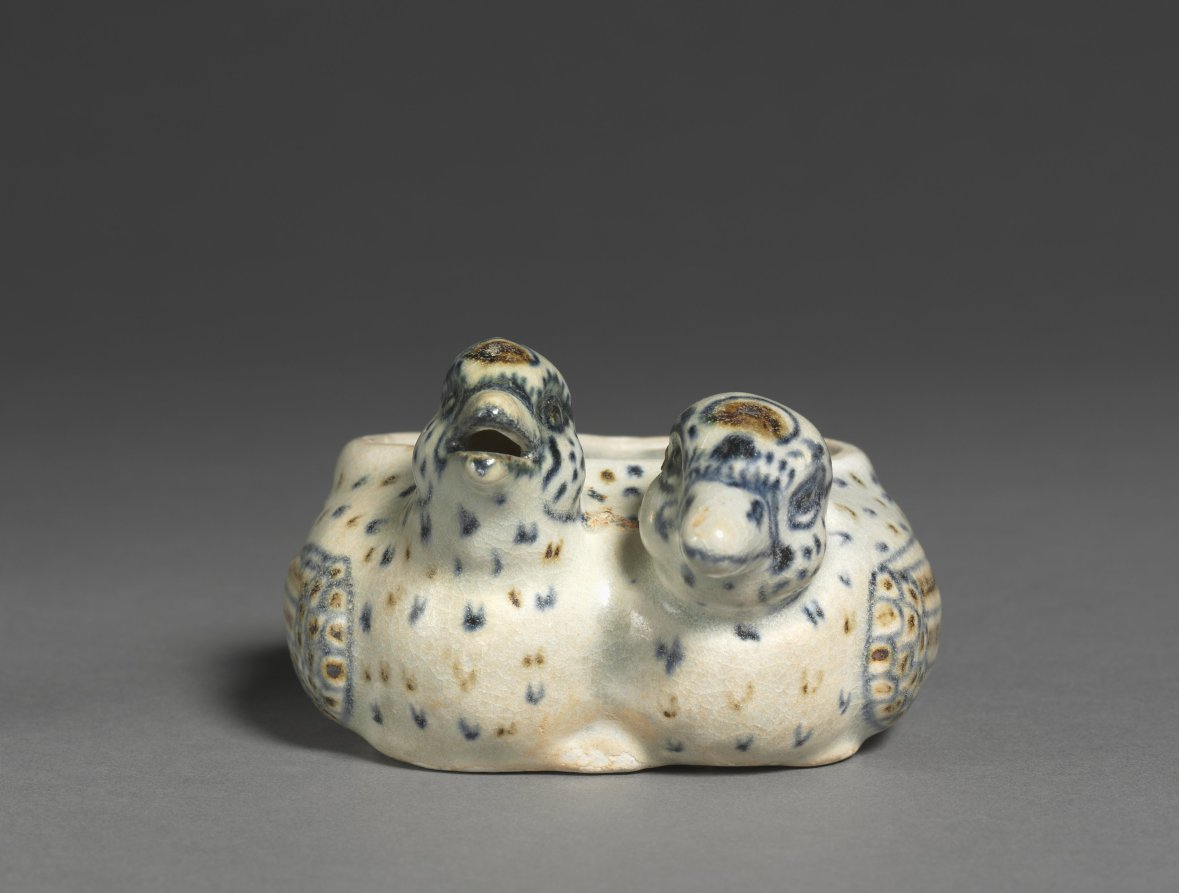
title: Double Ducks Jar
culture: Vietnam (Annam)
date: 1400s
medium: porcelain with underglaze blue and iron spots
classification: Ceramic